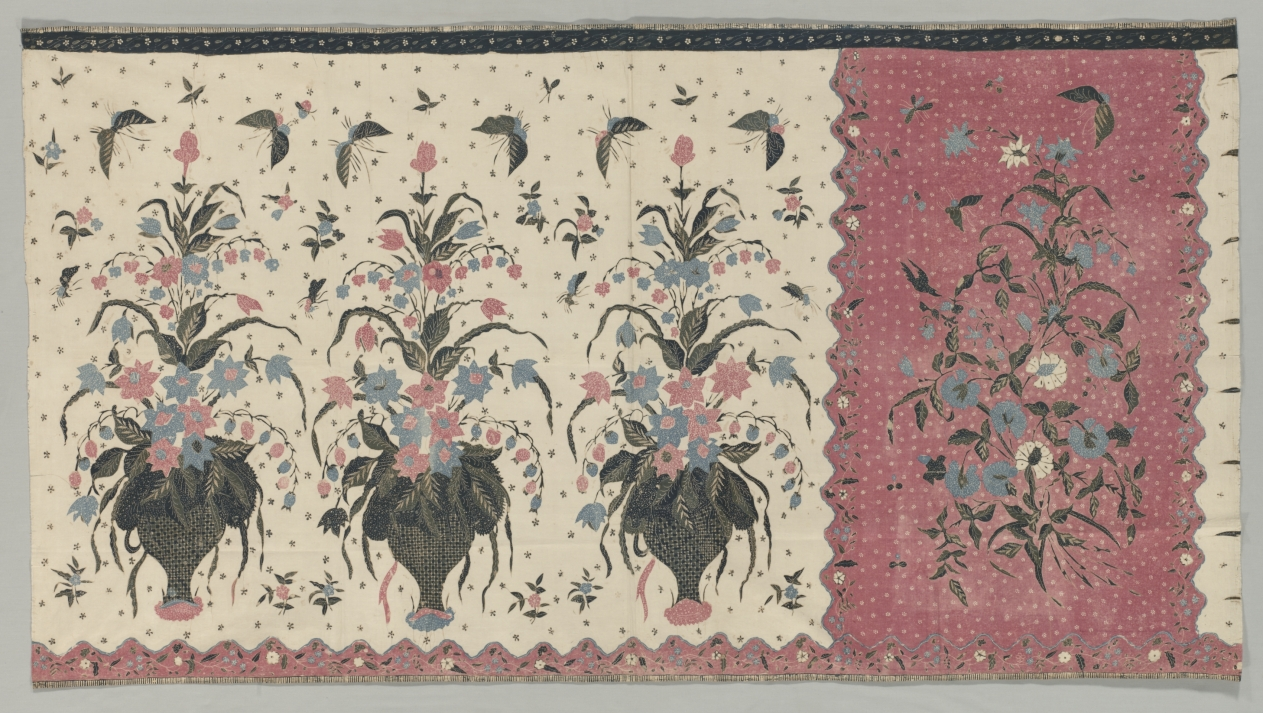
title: Sarong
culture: Indonesia, Java, early 20th century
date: early 1900s, before 1923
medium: plain weave cotton; resist dyed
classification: Textile